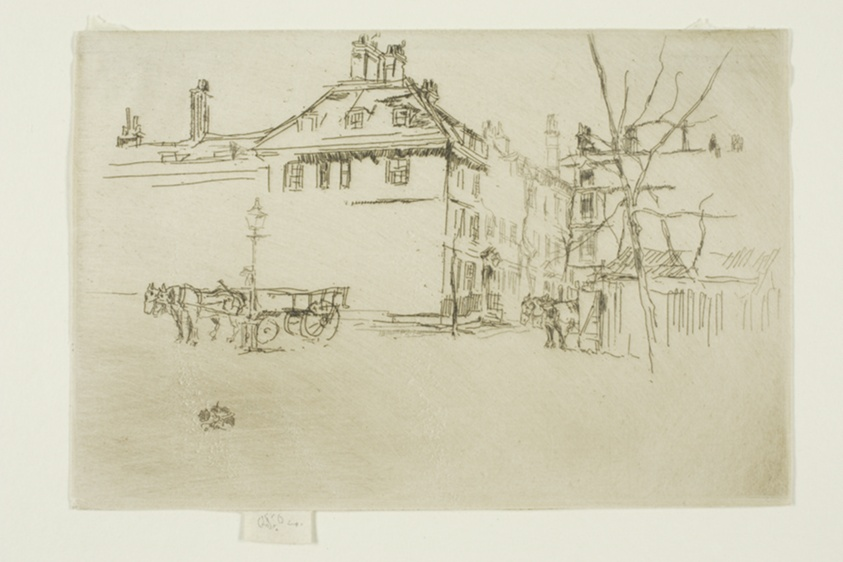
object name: Print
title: The Temple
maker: James McNeill Whistler (American, 1834-1903)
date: 1880/81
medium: Etching in black ink on ivory Asian laid paper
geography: United States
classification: etching; print; prints and drawing; paper